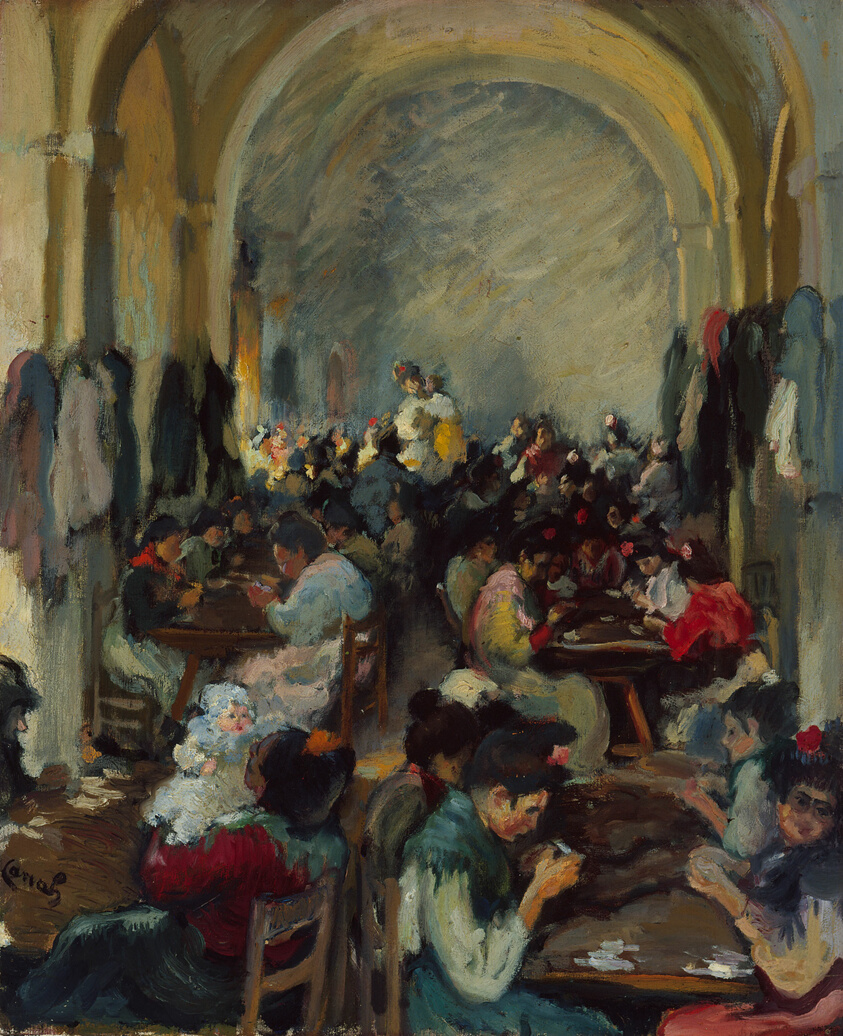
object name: Painting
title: Cigar Making in Seville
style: 19th century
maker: Ricardo Canals y Llambí (Spanish, 1876–1931)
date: 1899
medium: Oil on canvas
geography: Seville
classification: painting; oil paintings (visual works); paint; oil on canvas; spanish; european painting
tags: figures, artists, babies, chairs, cigars, factory, interior, tables, women